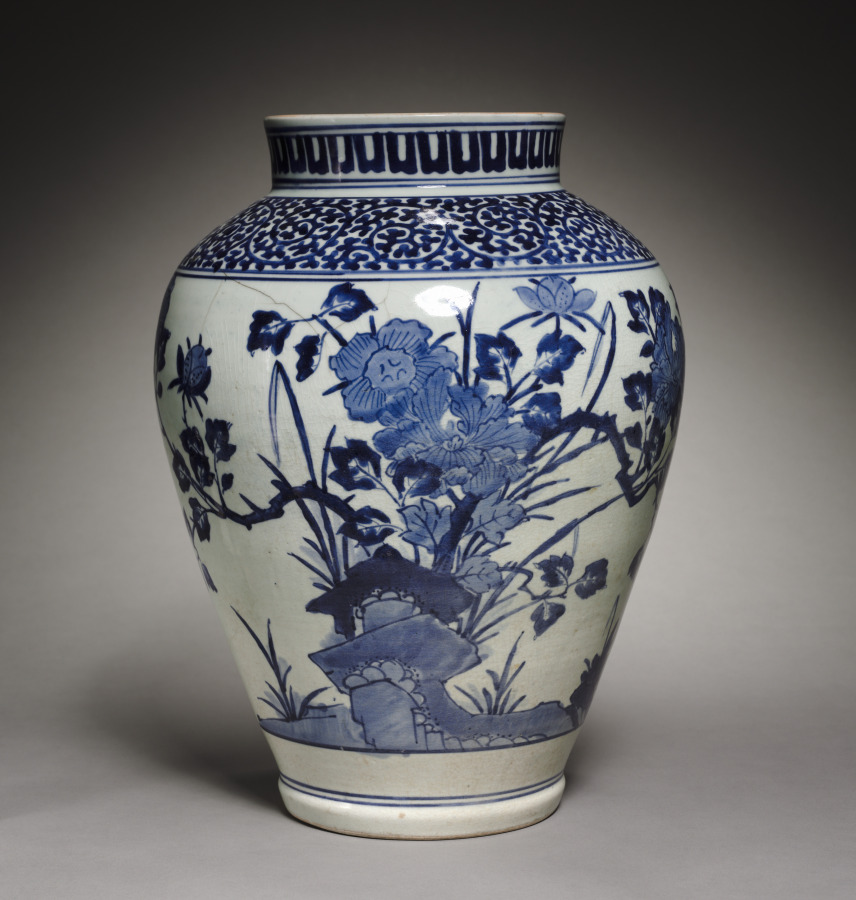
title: Large Jar with Peonies, Orchids, and Chrysanthemums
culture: Japan, Edo period (1615–1868)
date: late 1600s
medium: Porcelain with underglaze blue decoration (Imari ware)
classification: Ceramic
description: Spring peonies, summer orchids, and autumn chrysanthemums bloom at the same time amid garden rocks. These underglaze blue motifs were inspired by similar designs on Chinese ceramics made for export to Europe. In the early 1600s, Korean potters in Japan discovered kaolin, the clay essential for porcelain production. At the same time, political turmoil in China following the collapse of the Ming dynasty (1368–1644) disrupted Chinese exports. Together, these circumstances created an opportunity for Japan to supply ceramics to the European market. Careful study of Chinese prototypes shaped the work of Japanese ceramists for both domestic and overseas audiences.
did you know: This design shows the changing of the seasons: one side depicts a peony blossom in the spring, and the other side continues with chrysanthemums and an orchid in the autumn.